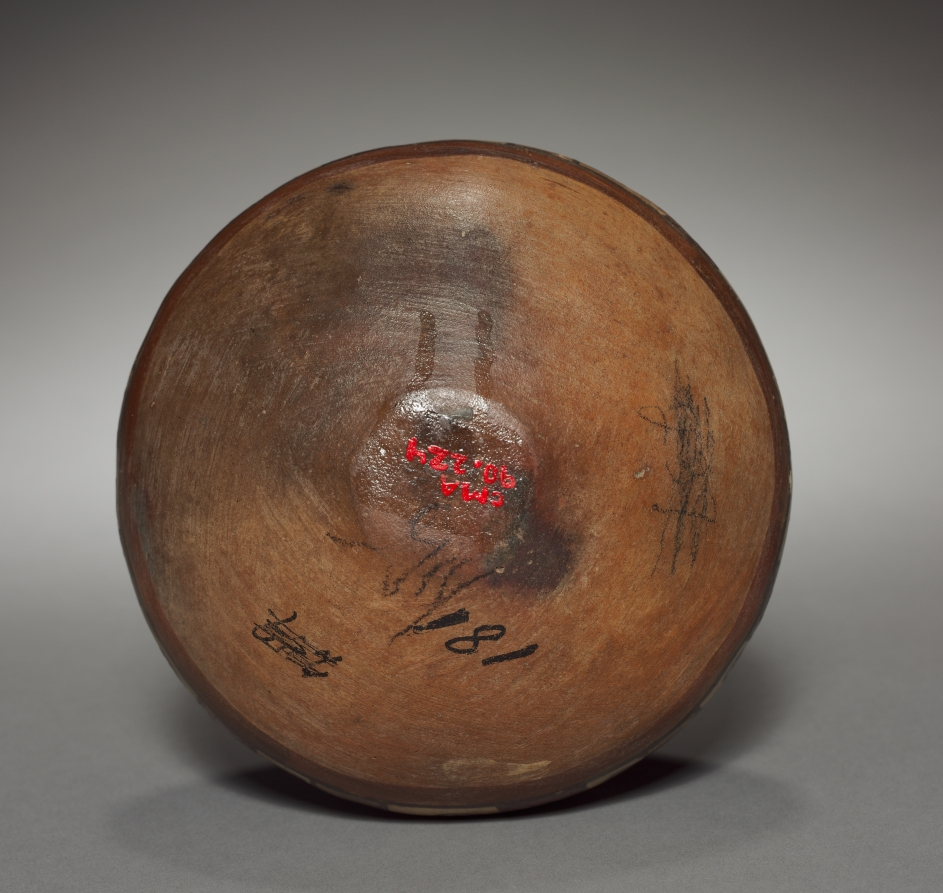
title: Vessel with Bird Designs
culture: Peru, South Coast, Middle Horizon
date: 700–1000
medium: pottery with burnished, colored slips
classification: Sculpture